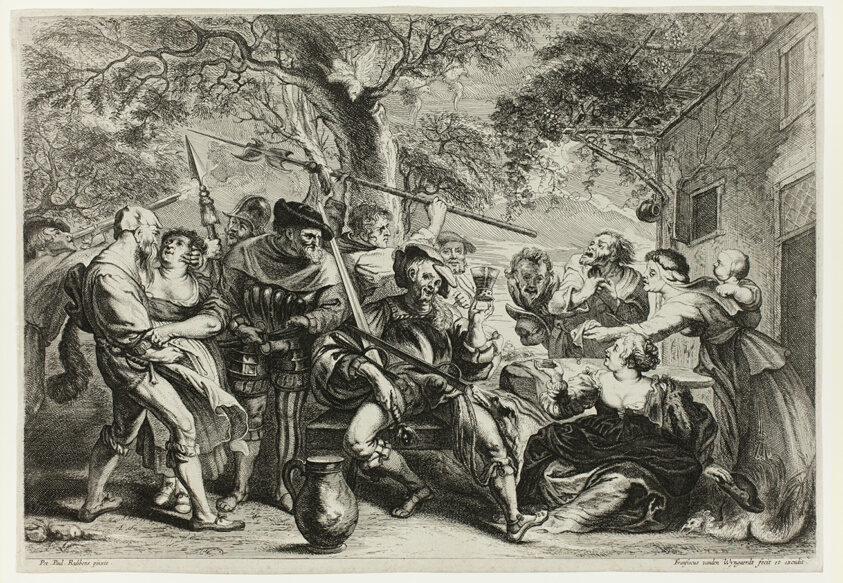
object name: Print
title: Soldiers and Peasants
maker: Frans van den Wyngaerde (Flemish, 1614–1679); after Peter Paul Rubens (Flemish, 1577–1640)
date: 1640/50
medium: Etching in black on ivory laid paper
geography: Flanders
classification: etching; paper; print; prints and drawing